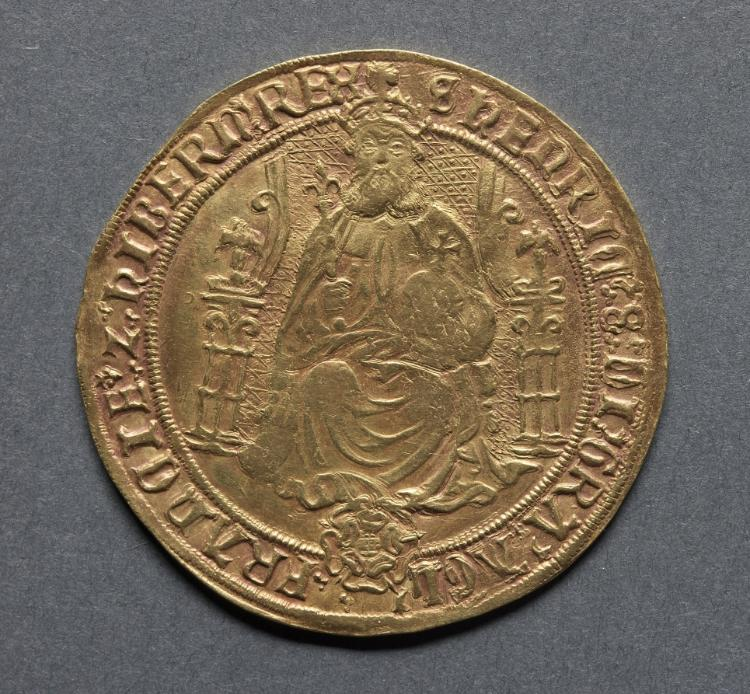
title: Sovereign (obverse)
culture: England, Henry VIII, 1509-1547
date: 1544–1547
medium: gold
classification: Coins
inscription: HENRIC. 8. DI. GRA. AGL FRNCIE Z. HIBERNIE REX.